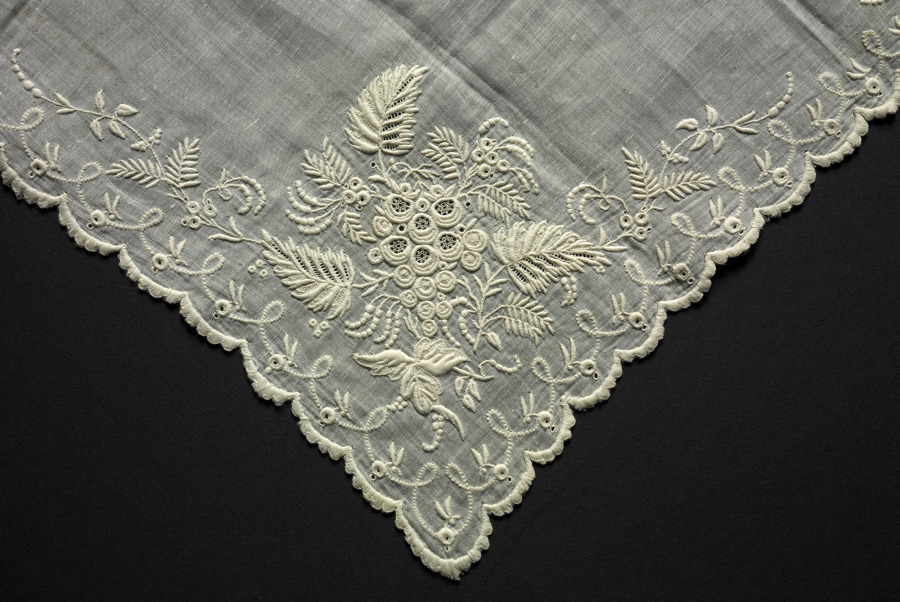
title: Embroidered Handkerchief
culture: Madeira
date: 1857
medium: Plain weave linen: linen embroidery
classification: Embroidery